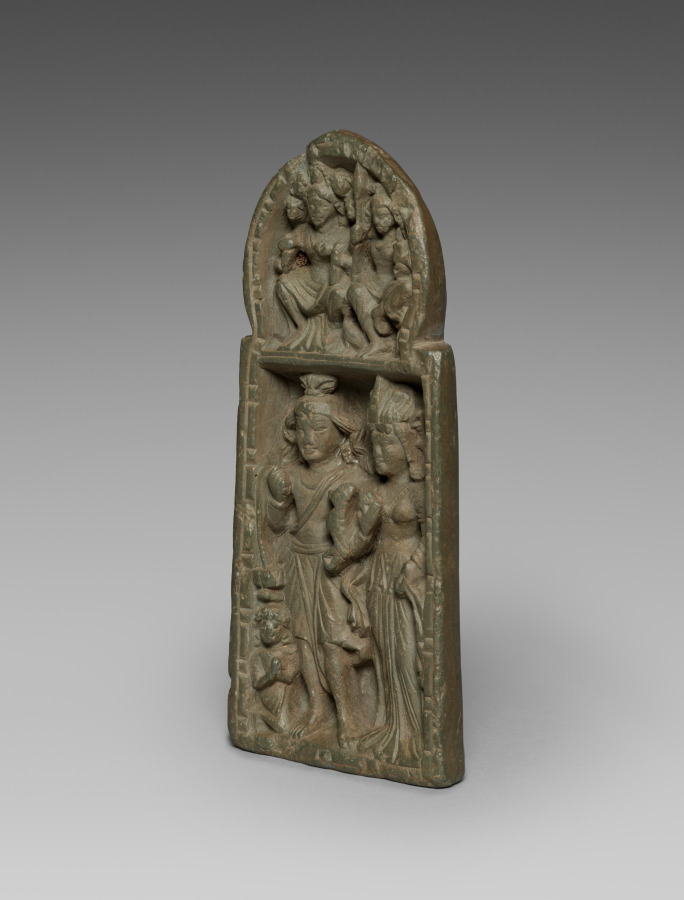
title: Section from a Portable Shrine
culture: Pakistan, Gandhara, Kushan period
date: 100s CE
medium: gray schist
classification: Sculpture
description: Figures of deities who protect children are featured in this relief carving. A form of Skanda holding a bird and a flower stands next to a regal yakshi with pointed rodent or elephant ears. A diminutive figure who may be a child is shown kneeling at his feet. Above, the six-headed mother goddess Shashthi sits next to Skanda, holding the spear.